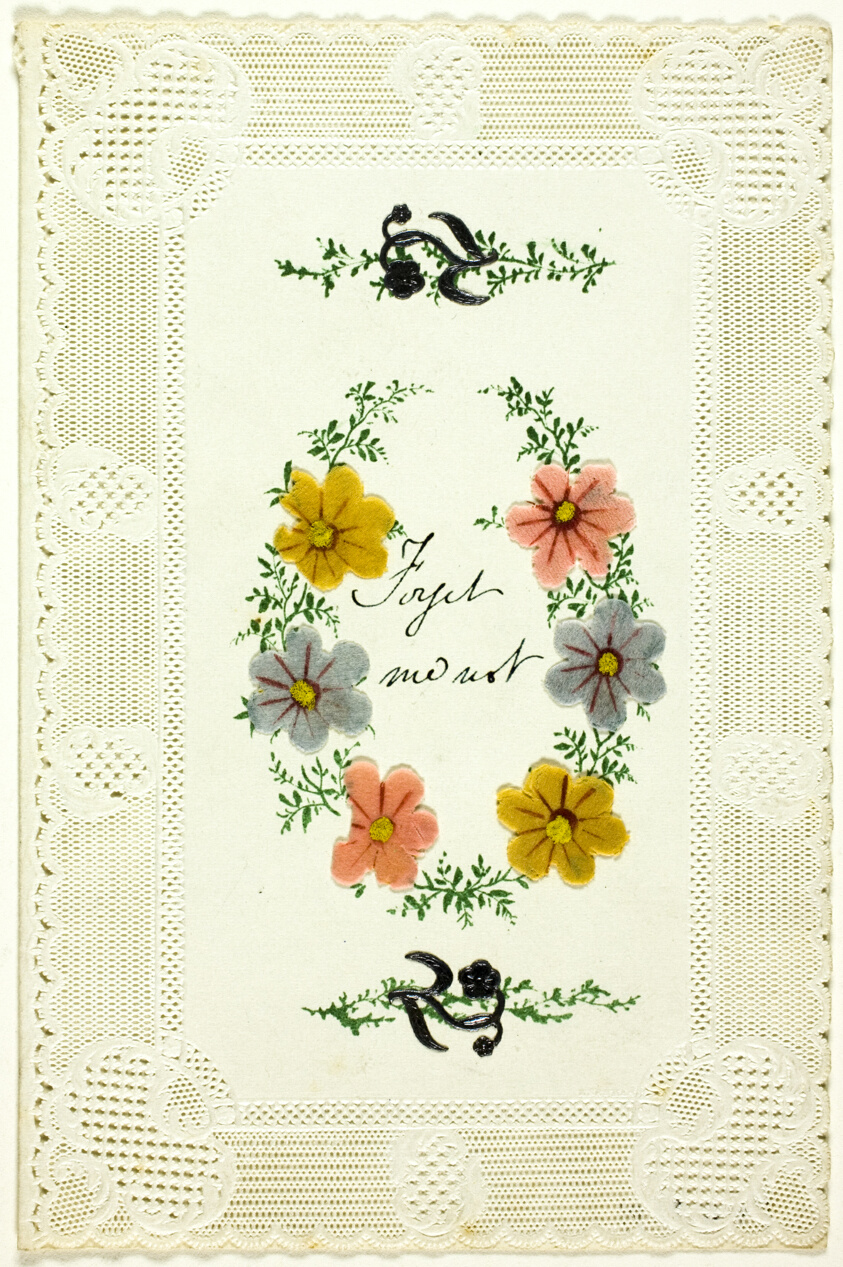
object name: Drawing and Watercolor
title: Forget Me Not (valentine)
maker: George Kershaw (English, 19th century)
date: c. 1840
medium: Collaged elements, with pen and black ink over lithograph in green ink on cut and embossed ivory wove paper (lace)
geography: England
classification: valentine; prints and drawing; paper